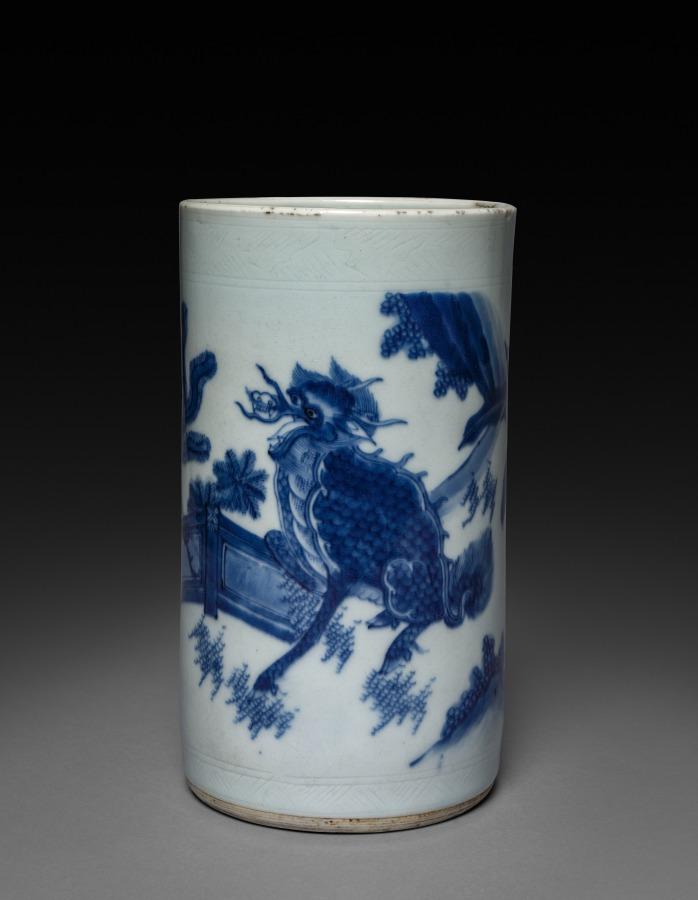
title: Brush Holder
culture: China, Jiangxi Province, Jingdezhen kilns, "Transitional period," Ming dynasty (1368–1644), Chongzhen reign (1628–1644)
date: 1628–44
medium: porcelain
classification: Ceramic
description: This porcelain brush holder is considered to have been made in the "Transitional period," a term used to define the period between about 1620 and 1683 when official kilns in Jingdezhen were no longer under imperial supervision due to the transition from the Ming to the Qing dynasties.